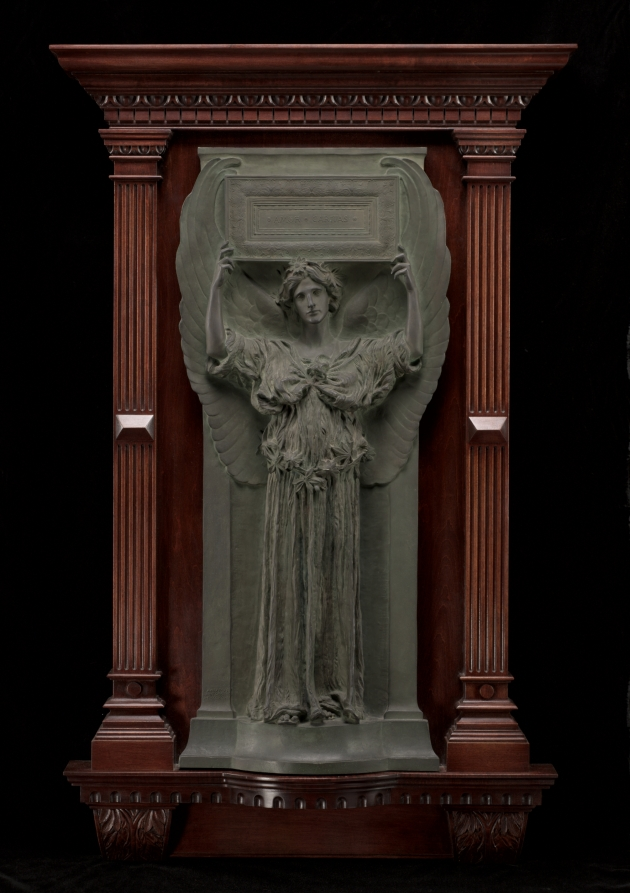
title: Amor Caritas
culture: America, late 19th Century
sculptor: Augustus Saint-Gaudens (American, born Ireland, 1848–1907)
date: modeled 1898, cast after 1898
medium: bronze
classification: Sculpture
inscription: Signed and dated lower left: Augustus Saint-Gaudens MDCCCXCVIII; inscribed on table: AMOR CARITAS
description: Saint-Gaudens based this angelic figure, an allegory of Love and Charity, on his longtime model and mistress, Davida Johnson Clark. The initial life-size bronze cast of the composition received much acclaim, and the artist regarded it as “one of the things I care for most that I have done.” Due to its popularity, approximately 20 smaller-scale versions, including this example, were produced by Saint-Gaudens and sold through high-end retail outlets such as Tiffany & Co. in New York.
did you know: An elementary school in Manhattan is named in Saint-Gaudens's honor.